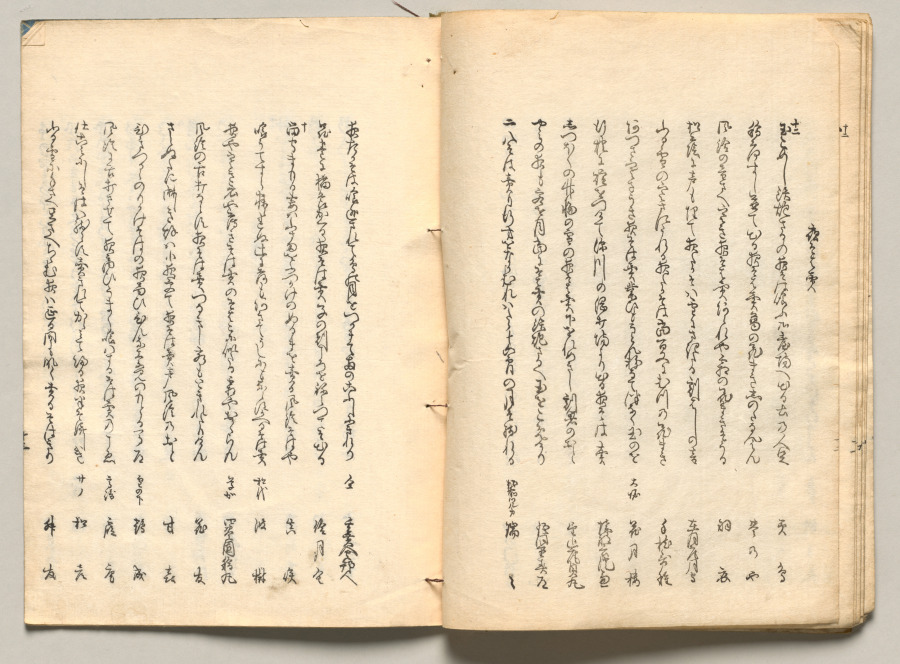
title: Spread Twenty-One from Volume Four of People of Japan in Light Verse (Kyōka)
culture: Japan, Edo period (1615–1868)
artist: Utagawa Hiroshige (Japanese, 1797–1858)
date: 1857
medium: Woodblock-printed book; ink and color on paper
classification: Bound Volume